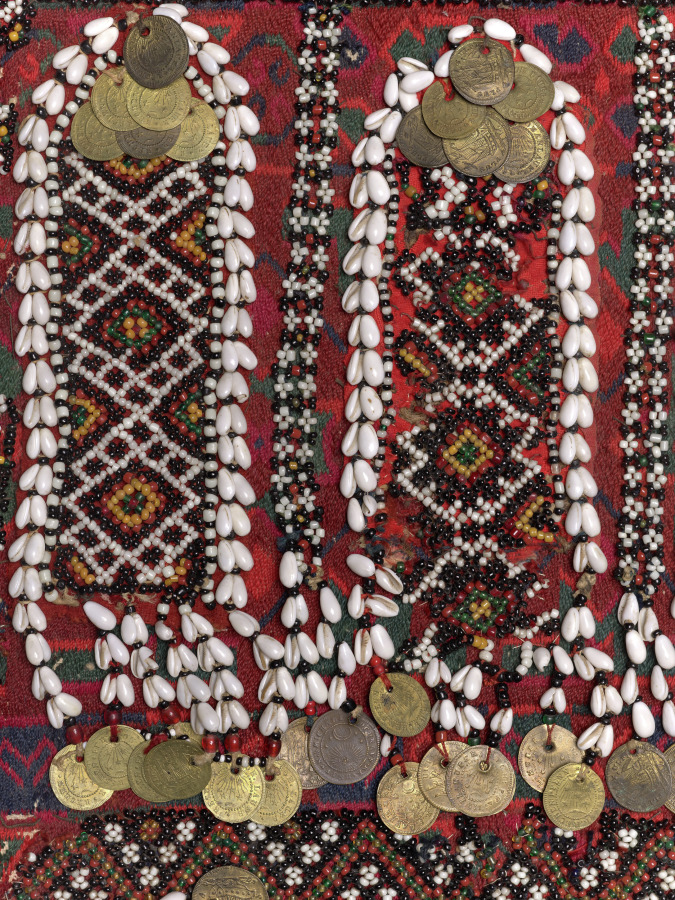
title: Headdress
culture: probably southeastern Europe, Balkans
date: 1800s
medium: Linen, shells, glass beads, metal coins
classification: Garment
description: This long, colorful headdress would hang over the head and down a woman's back. It consists of several panels of linen sewn together, and densely embroidered with silk thread. On the middle panel, small black, red, white, yellow, and red beads are stitched to create geometric designs. Double rows of small cowrie shells outline them, and metal coins with a crescent moon motif also feature in the decoration. These are first punctured, then stitched onto the textile. The lowermost edge is finished with a red fringe.